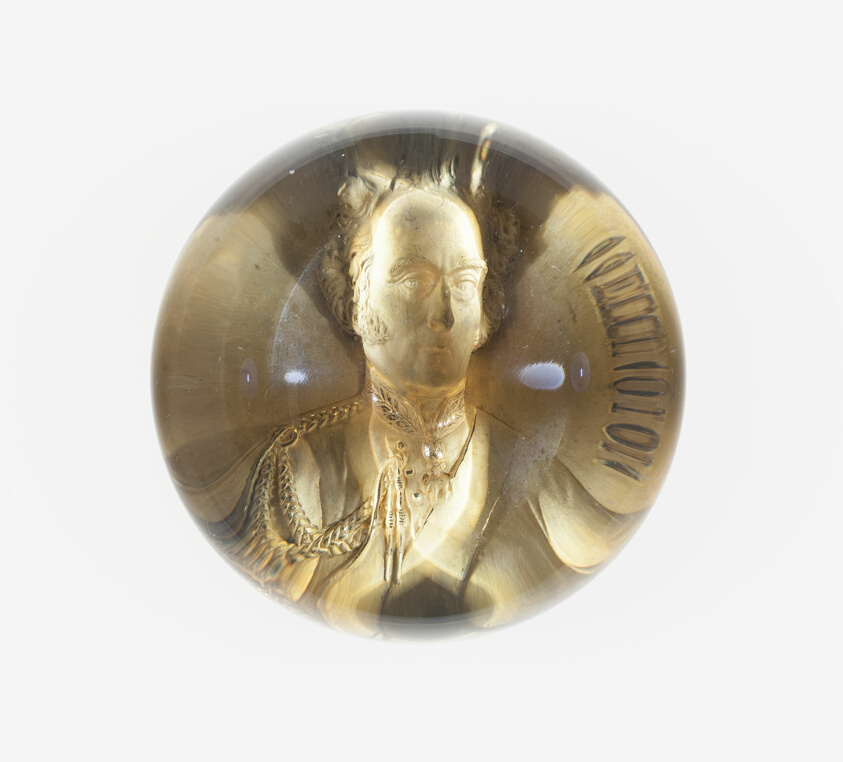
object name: Glass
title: Paperweight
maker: European, possibly English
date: Mid 19th century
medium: Glass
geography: England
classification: paperweight; glass